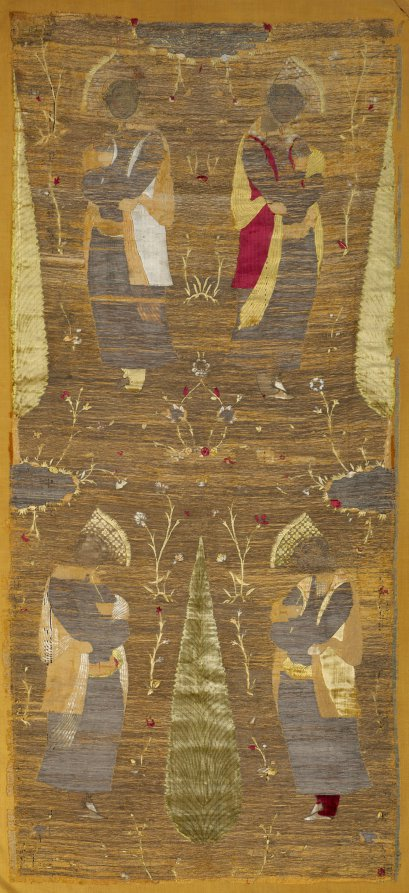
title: Velvet panel with four youths smelling flowers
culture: Iran, Isfahan or Yazd, Safavid period (1501-1722)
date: 1625–50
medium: Silk: velvet, brocaded, and pile-warp substitution; gilt- and silver-metal thread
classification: Velvet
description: A new style depicting single figures with limited modeling and European artistic influence was spearheaded by the Iranian painter Riza ‘Abbasi and adopted by textile designers in sumptuous brocaded velvets. Even with faded colors, this grand length retains ten colors of velvet pile, a feat that Iranian velvet weavers achieved by skillfully replacing colored pile warp during weaving, and thereby creating the most colorful velvets in the world. Elegant youths dominate the simplified outdoor setting here with diminutive cypresses and silver ponds on a ground originally covered with gold thread. Fashionably dressed young men wear wide-brimmed hats, silver robes, stole-like scarves, and knotted sashes that are symbols of status and rank.